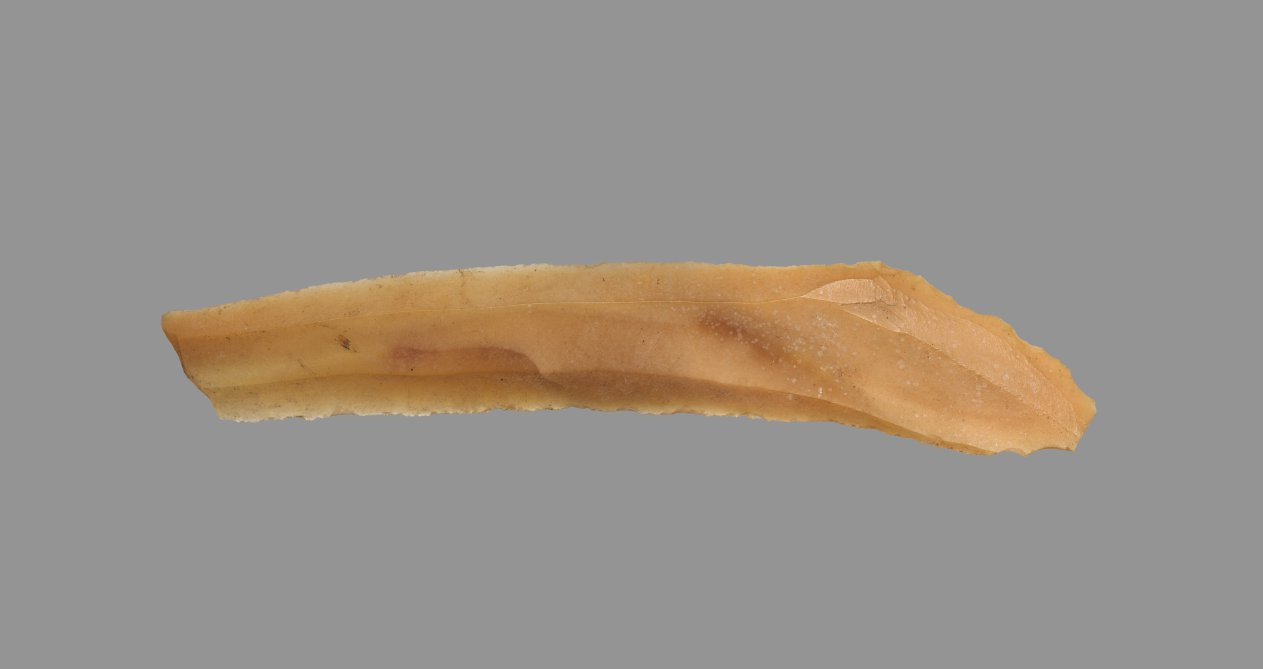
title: Sickle Blade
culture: Egypt, Middle Kingdom (2040–1648 BCE), Dynasty 12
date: 1980–1801 BCE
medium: flint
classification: Implements